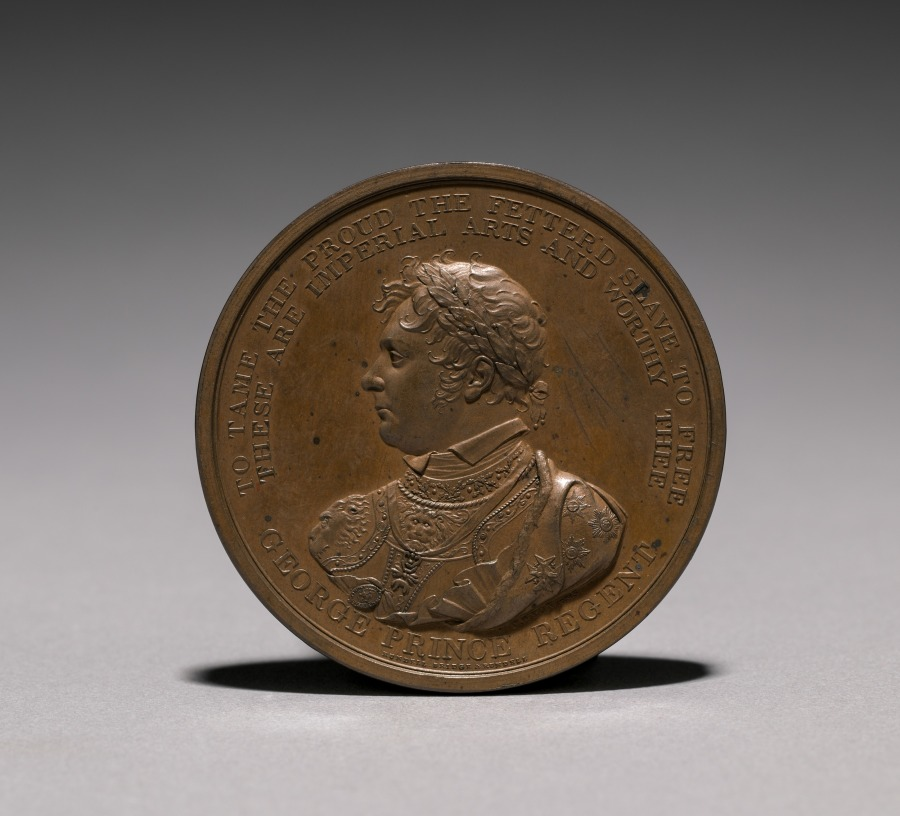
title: Medal: George, Prince Regent (obverse)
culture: England, 18th century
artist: Thomas Wyon Jr. (British, 1792–1817)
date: 1816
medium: bronze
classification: Metalwork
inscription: To tame the proud the fetter'd slave to free.